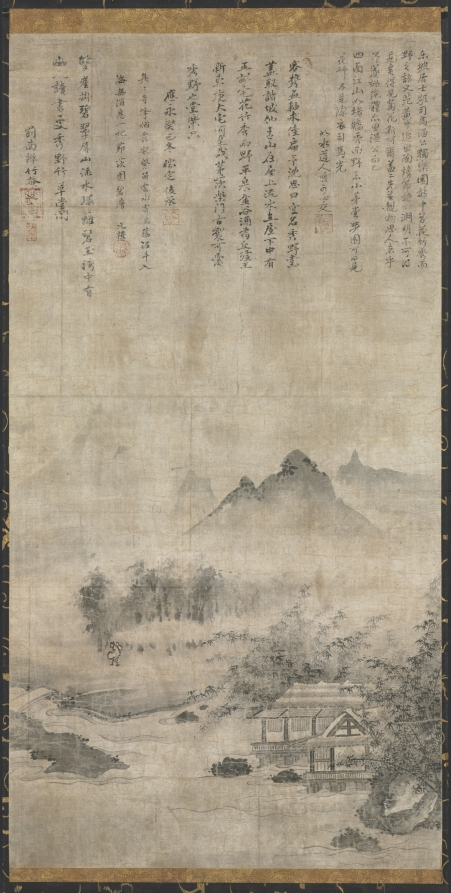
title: Landscape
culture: Japan, Edo period (1615–1868)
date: 1700s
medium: hanging scroll; ink and color on silk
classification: Painting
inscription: four inscriptions (one dated to 1414) by Japanese monks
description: This composition was fashioned after works created by Zen clerics of the Muromachi period (1392–1573), who often added their original Chinese-style poems above an ink painting to make a hanging scroll called a shigajiku. The poems here quote from essays on Sima Guang (1019–1086) by the Chinese Song dynasty literatus Su Shi (1037–1101). They interpret the studio surrounded with bamboo as a metaphor for the garden of Sima, the Song dynasty scholar-official who, in imitation of the Tang poet Bai Juyi, enjoyed the garden in isolation during his exile in Luoyang.